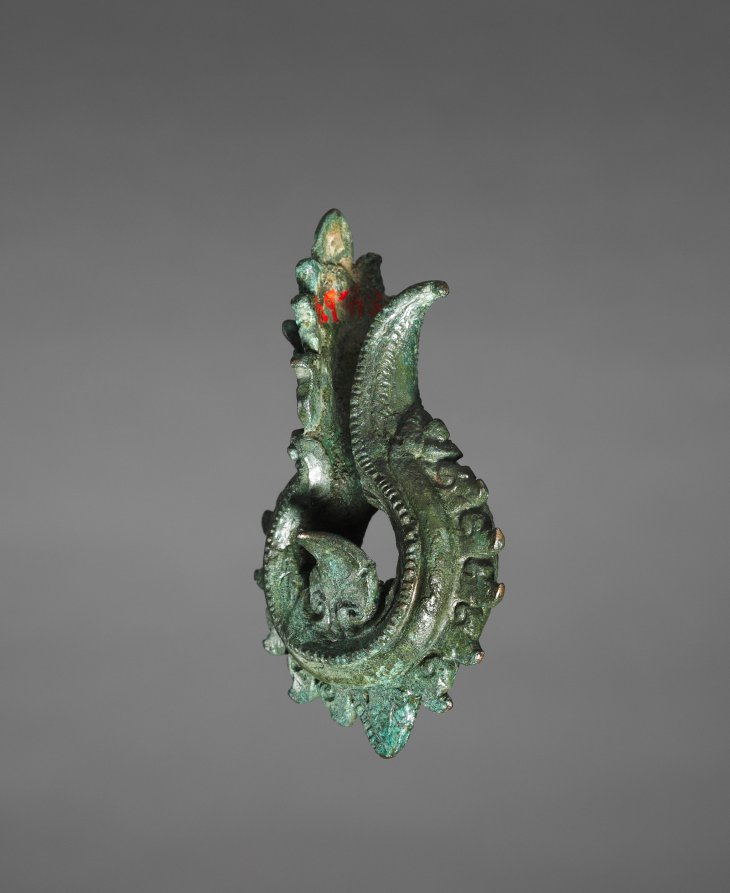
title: Earring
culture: Cambodia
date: 1200s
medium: bronze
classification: Jewelry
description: This earring is in the form of naga, or water serpent, one of the most popular decorative motifs in Cambodian art. While bronze objects such as furniture and palanquin fittings and finials, hooks, rings, etc., were among the most typical items of the classical Angkorean art (12th–13th century), jewelry is very rare. Originally, it must have been gilt. It is conceivable that this earring may not have been used as a regular ear ornament but enhanced a Khmer sculpture, a common practice, which would explain their heavy weight and large size.